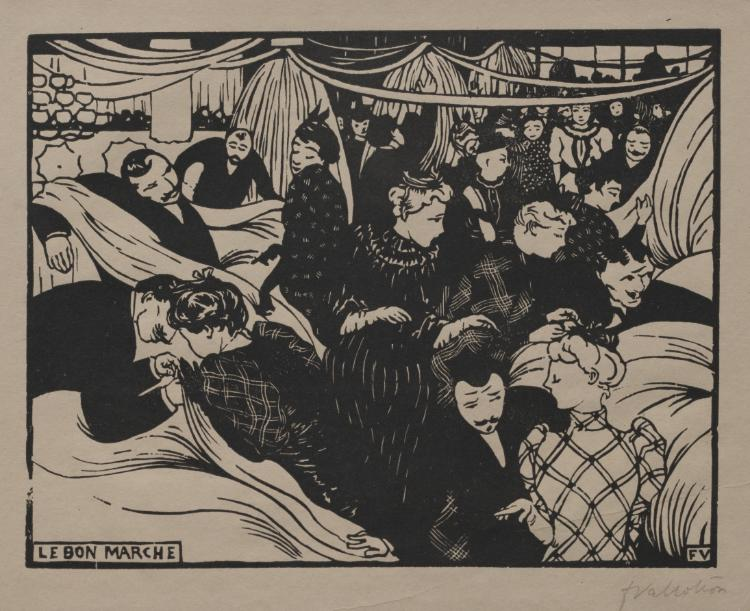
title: Bon Marché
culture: France, 19th century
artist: Félix Vallotton (Swiss French, 1865–1925)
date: 1893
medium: woodcut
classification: Print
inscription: signed, in graphite, lower right, below image: fVallithon